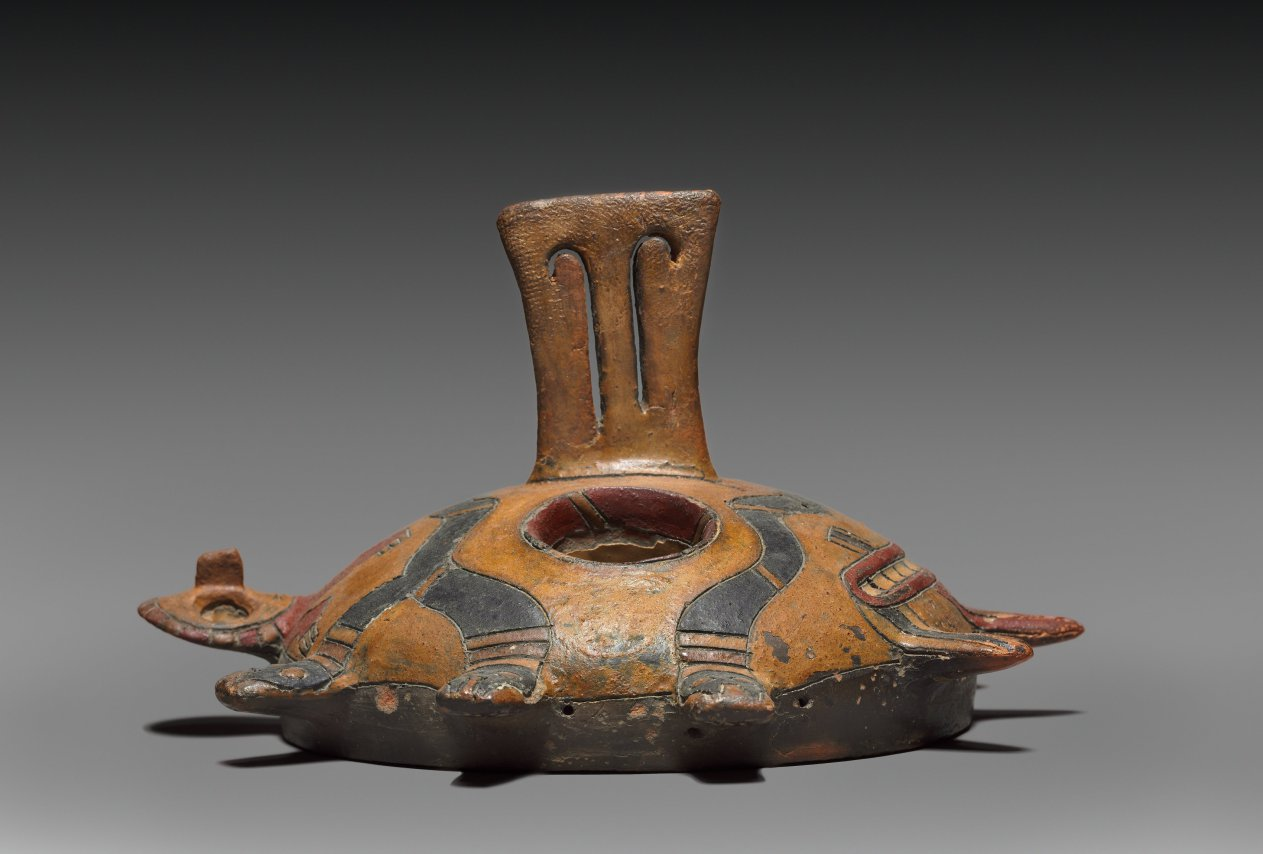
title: Oculate Being Mask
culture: Peru, South Coast, Paracas (Cavernas) style (700 BCE–1 CE)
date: 300 BCE–1 CE (thermoluminescence date, 835 BC–185 CE)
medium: ceramic, resin-based paint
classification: Ceramic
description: This rare mask incarnates a supernatural being who may have been the patron of an early fertility cult on Peru’s south coast. Its traits insinuate power, especially the stuck-out tongue and the serpents that slither over the face to form a halo-like corona. Unexplained are the shape of the nose and the small figure wearing a similar mask. The mask could have served as the face of a mummy bundle or an object; the projecting eyes might rule out use by a living performer.